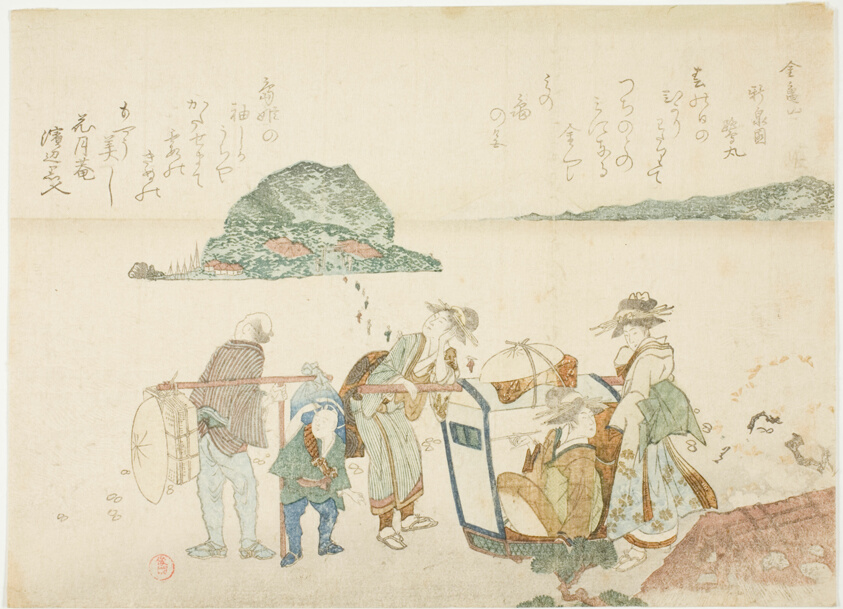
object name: Print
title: Visitors to Enoshima, from the album "Mountains of the Four Quarters (Yomo no yama)"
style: Japanese (culture or style)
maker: Kubo Shunman (Japanese, 1757–1820)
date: early 19th century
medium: Color woodblock print; surimono, page from an album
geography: Japan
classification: woodblock print; print; asian art